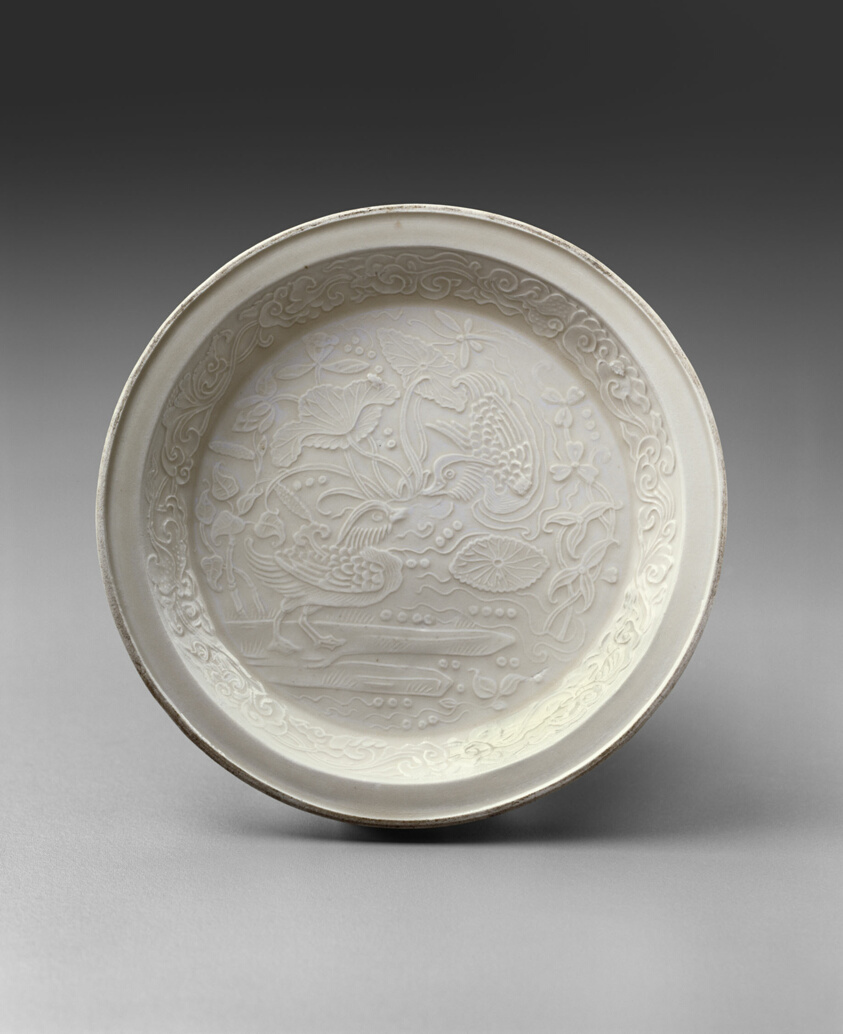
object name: Vessel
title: Dish with Mandarin Ducks in a Lotus Pond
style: Chinese (culture or style)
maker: China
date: Jin dynasty (1115–1234), 12th century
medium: Ding ware; porcelain with underglaze molded decoration; metal rim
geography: China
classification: dish (vessel); porcelain; asian art; ceramics; vessel